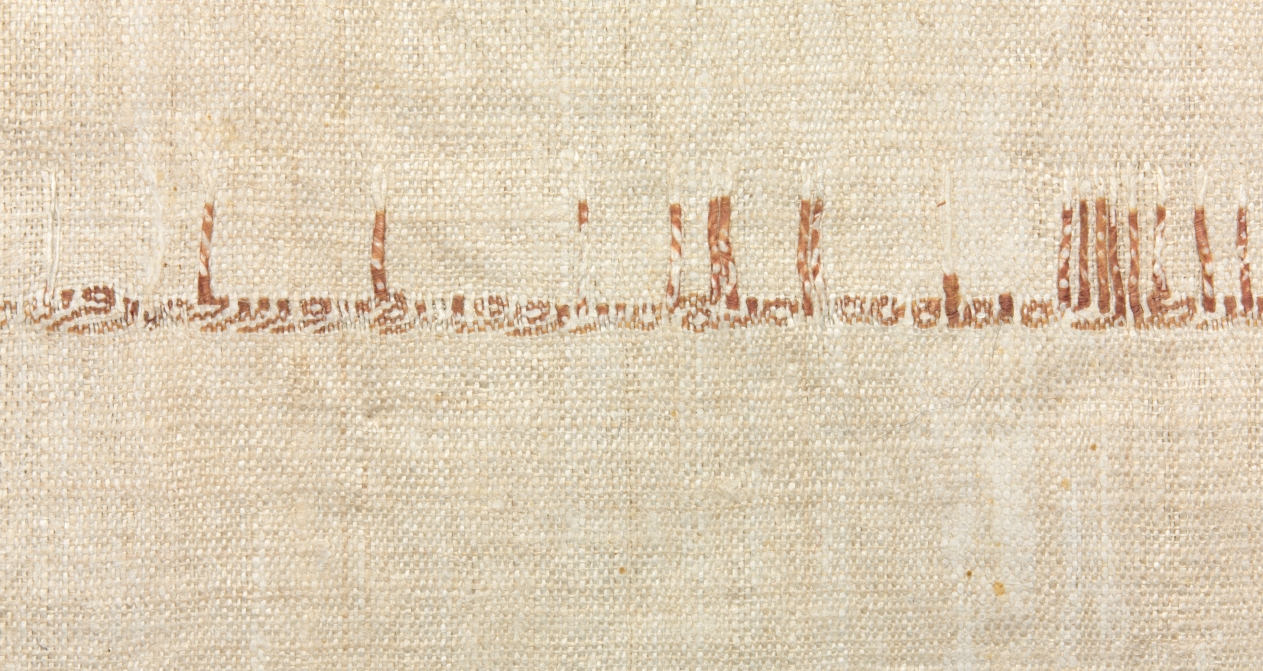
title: Fragment of a Tiraz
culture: Egypt, Tulunid period, Reign of emir Harun b. Khumarawayh, under the Caliphate of al-Muktafi, AH 291 (A.D. 903-904)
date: 903 – 904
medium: tabby ground with inwoven tapestry inscription; linen and silk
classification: Embroidery